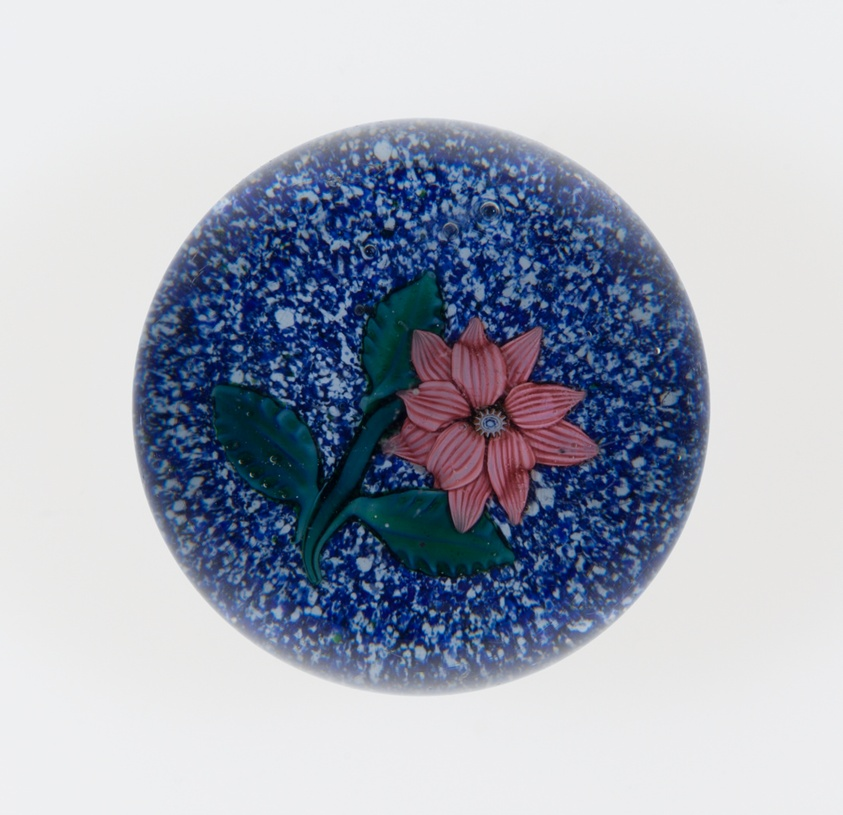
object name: Glass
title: Paperweight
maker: Saint-Louis Glassworks (Cristalleries de Saint-Louis); Lorraine, France, founded 1586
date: c. 1848–55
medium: Glass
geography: Saint-Louis-lès-Bitche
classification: paperweight; glass; european decorative arts